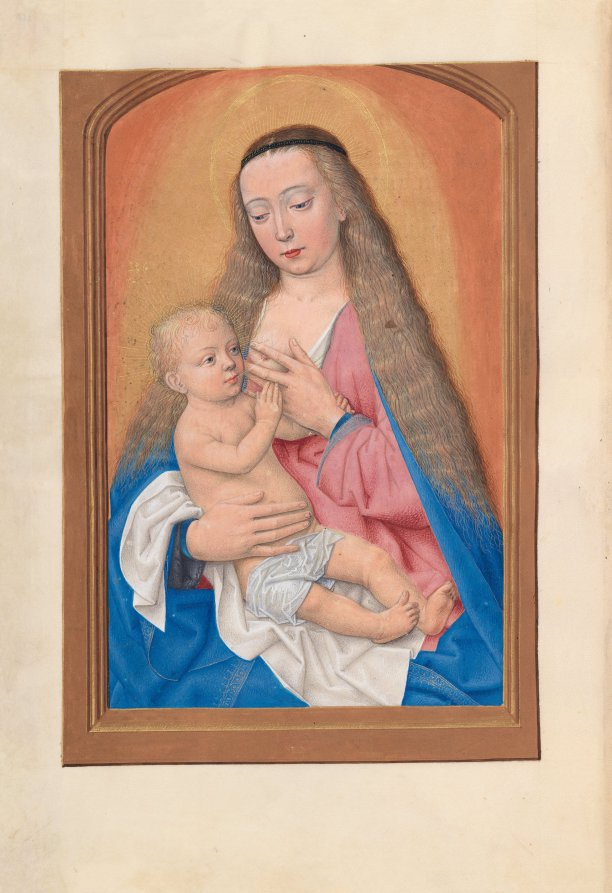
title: Hours of Queen Isabella the Catholic, Queen of Spain: Fol. 257v, Madonna and Child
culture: Flanders, Ghent and Bruges, late 15th century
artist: Master of the First Prayerbook of Maximillian (Flemish, c. 1444–1519)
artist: and Associates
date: c. 1500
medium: ink, tempera, and gold on vellum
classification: Bound Volume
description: This manuscript was illuminated by a circle of at least five highly organized manuscript painters active in the Flemish cities of Ghent and Bruges. The principal illuminator was Alexander Bening, who painted the majority of the book's miniatures. Manuscripts produced by this circle of artists are renowned for the decoration of their borders, which typically feature a rich variety of realistically-painted flowers, birds, and butterflies. This prayer book, called a book of hours, was intended not for a cleric, but for the private devotions of a lay person-in this case, Isabella the Catholic, Queen of Spain (1451-1504). Isabella's coat of arms embellishes the book's frontispiece. It is unlikely that the book was commissioned by the Queen herself; rather, she probably received it as a diplomatic gift from someone courting her patronage, perhaps Cardinal Francisco Jimenez de Cisneros. A Franciscan friar, Jimenez was dependent upon Isabella for his advancement, first to the post of Queen's confessor in 1492, and then to Archbishop of Toledo in 1495.